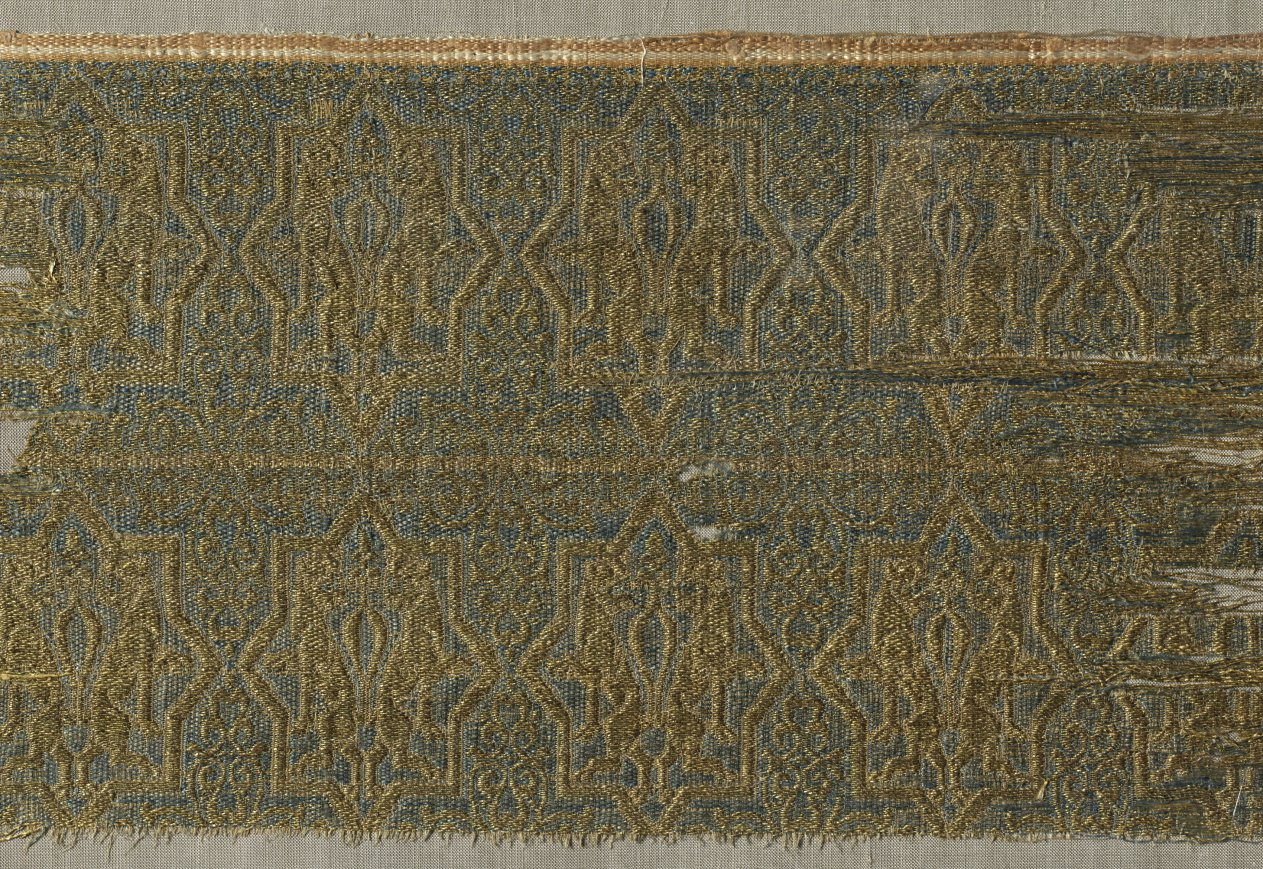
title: Taqueté fragment with star and cross pattern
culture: Spain, probably Almeria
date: 1200s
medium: taqueté: silk and gold thread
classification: Textile